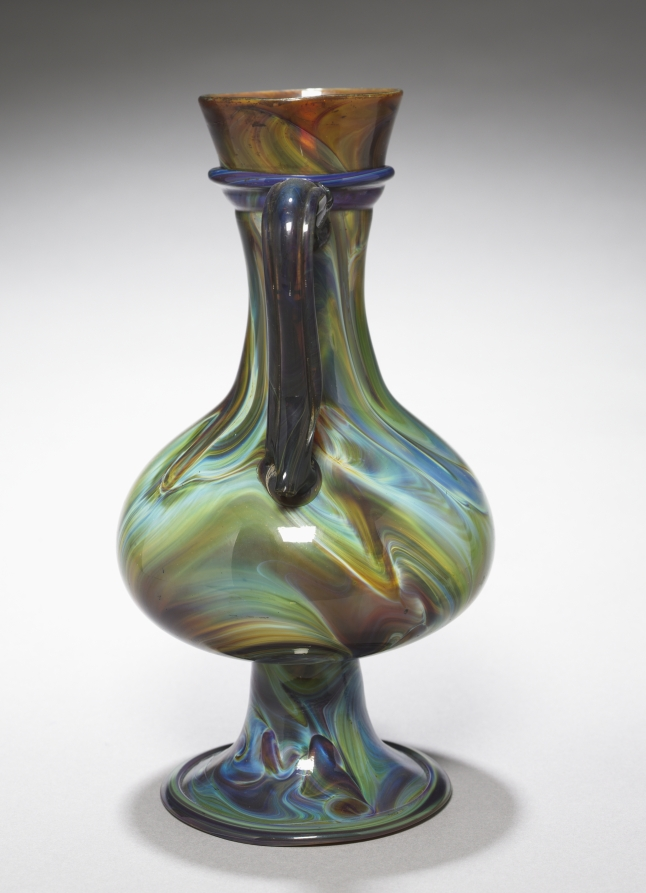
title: Ewer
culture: Italy, Venice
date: c. 1500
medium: "Chalcedony" inlaid glass; silver mount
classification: Glass